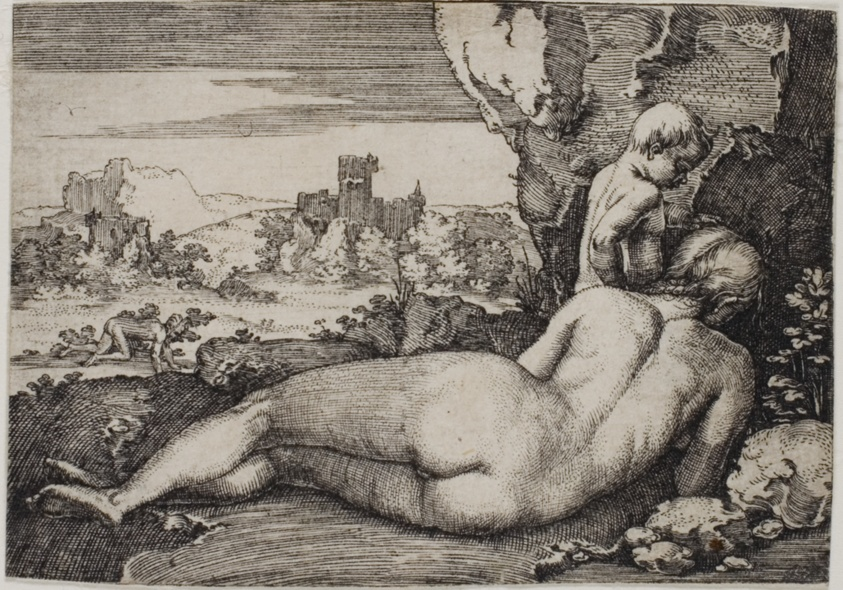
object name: Print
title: Penance of St. John Chrysostomus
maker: Sebald Beham (German, 1500-1550); after Barthel Beham (German, 1502-1540)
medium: Engraving in black on ivory laid paper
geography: Germany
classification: engraving; print; prints and drawing